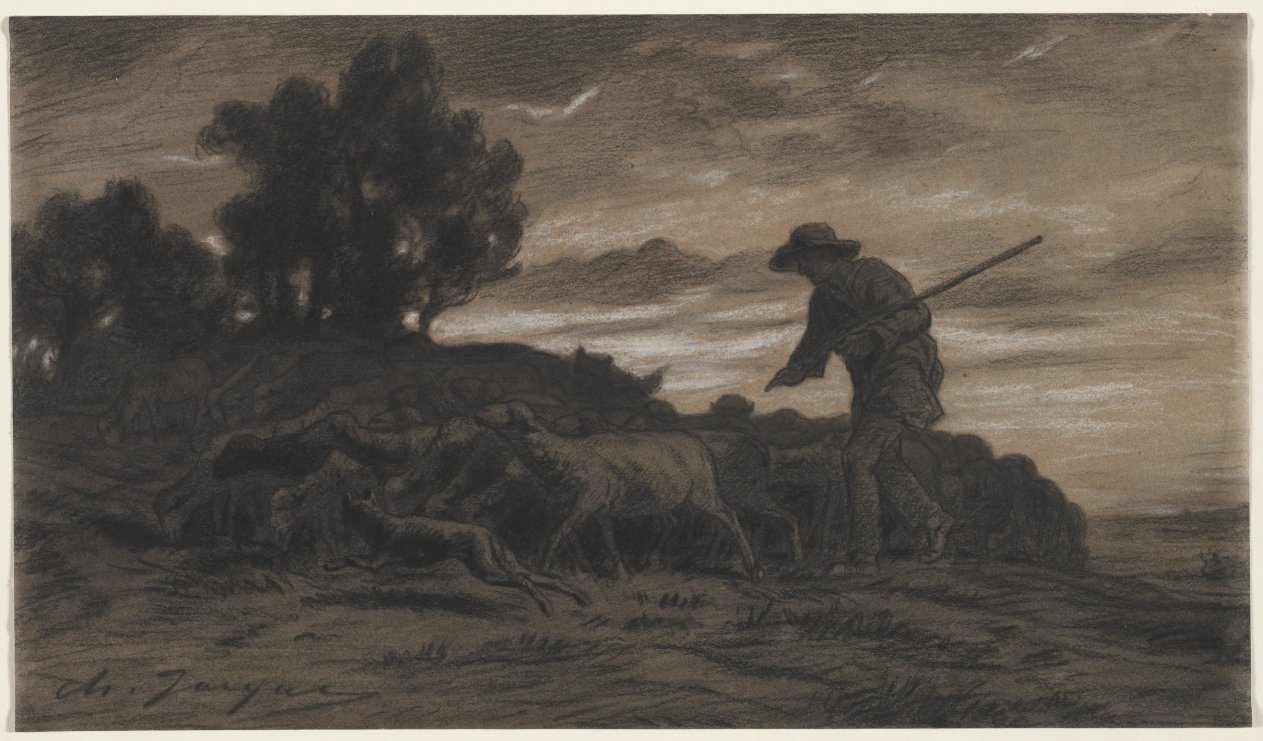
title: A Shepherd with His Flock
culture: France, 19th century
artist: Charles-Émile Jacque (French, 1813–1894)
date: 1800s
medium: black chalk heightened with white chalk and stumping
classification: Drawing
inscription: signed, lower left, in black chalk: Ch. Jacque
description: The notion of the pastoral ideal is made explicit in the work of Jacque. In 1849, along with Jean-François Millet, Jacque moved to the village of Barbizon, which by then was an established artist’s colony. There he painted, drew, and etched rustic landscapes in which man and nature coexist in perfect harmony.